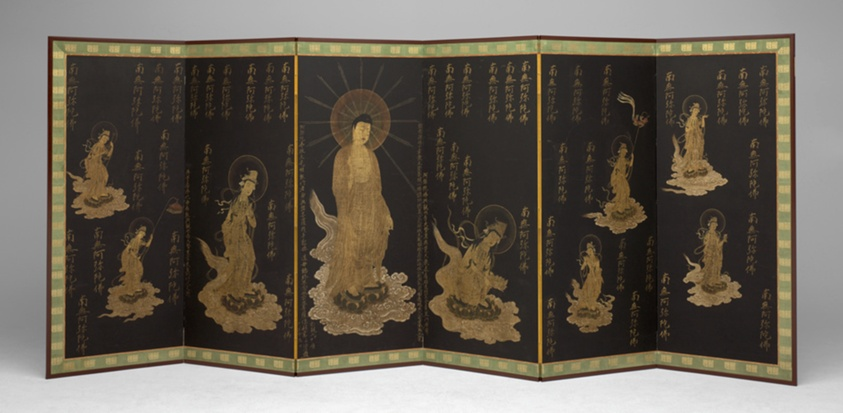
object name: Painting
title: Rebirth of the Nun Anyo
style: Japanese (culture or style)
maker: Artist Unknown; Japanese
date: early 18th century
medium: Pair six-panel screens; ink, colors, and gold on paper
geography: Japan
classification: painting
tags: Buddhism, religion